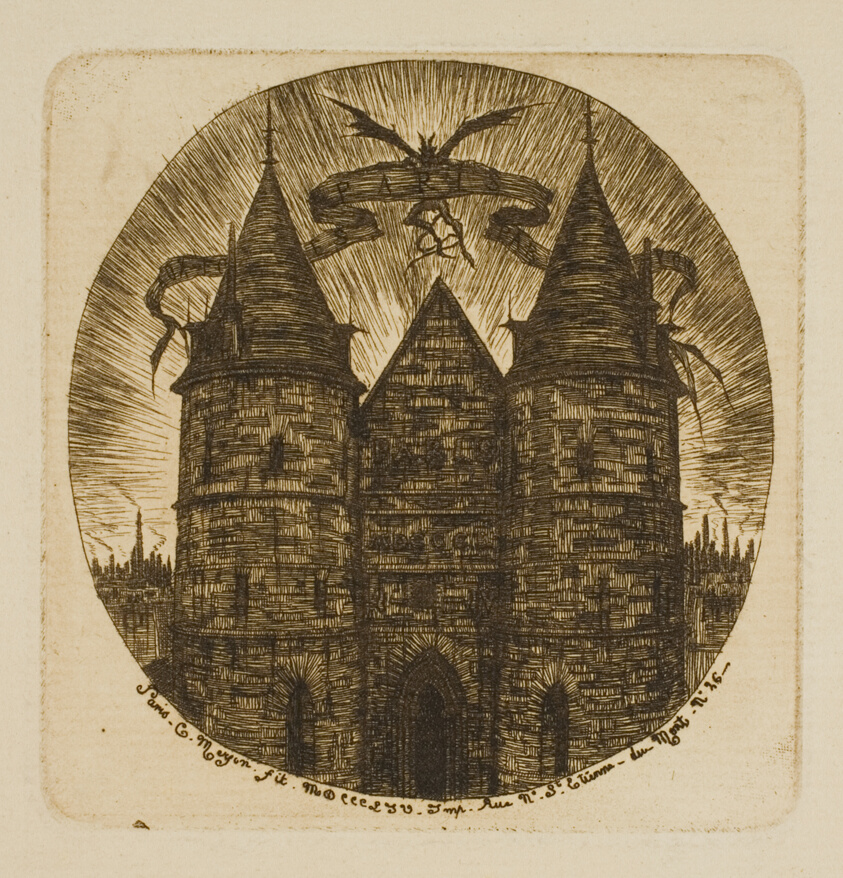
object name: Print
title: The Old Gate of the Palais de Justice, Paris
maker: Charles Meryon (French, 1821-1868)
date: 1854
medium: Etching and drypoint on ivory laid paper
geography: France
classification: etching; print; prints and drawing